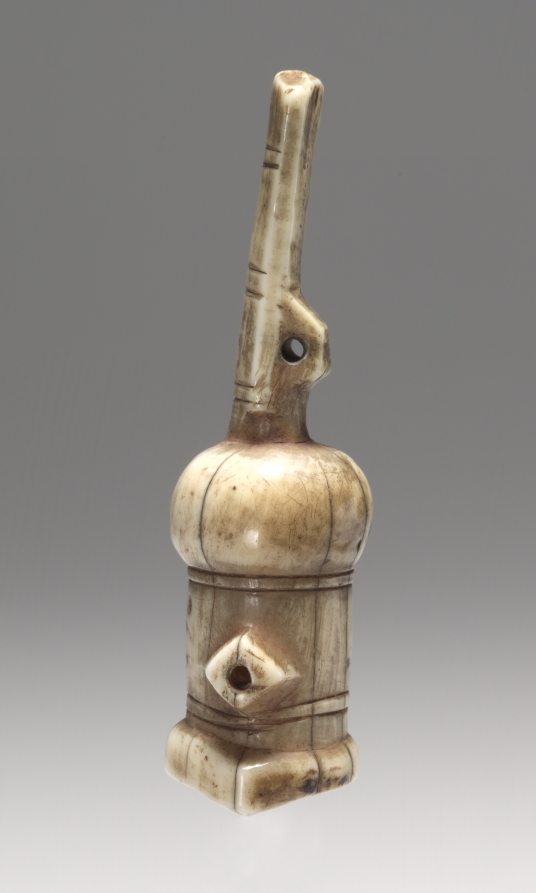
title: Whistle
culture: Central Africa, Democratic Republic of Congo or Angola, Chokwe people, late 19th century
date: late 1800s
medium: Probably hippopotamus ivory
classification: Musical Instrument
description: Carved out of ivory or wood in a variety of shapes, Chokwe whistles often bear miniature, stylized renderings of masks. Cikunza, the "patron saint" of the boys' initiation into manhood, is depicted with a pointed extension imitating the horn of a road antelope, symbolizing the fertility spirit. Typically such whistles were used by men during the hunt to communicate with their co-hunters and to call their dogs. They were either worn attached to a string as a necklace or tied to a spear.